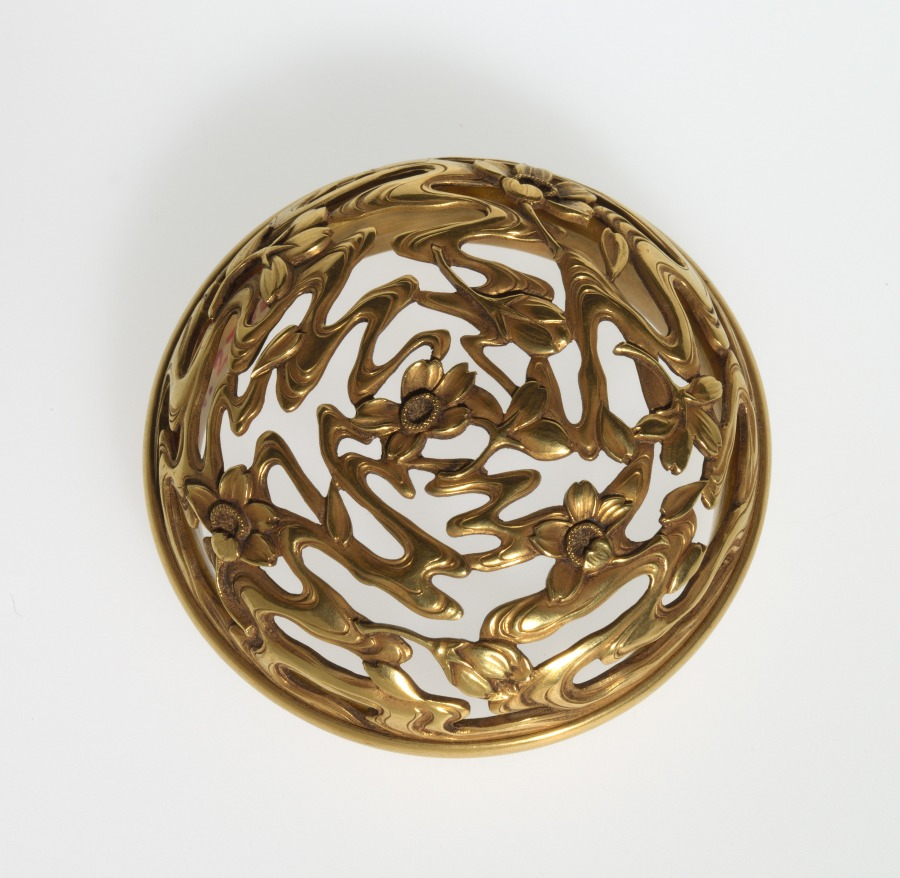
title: Incense Burner with Floral Scroll (lid)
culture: Japan, Edo period (1615–1868)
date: early to mid-1800s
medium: bronze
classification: Ceramic